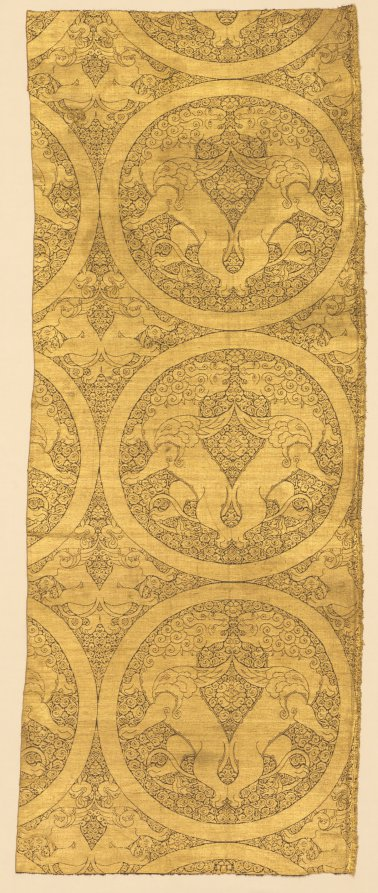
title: Cloth of gold with winged lions and griffins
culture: Central Asia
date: 1225–75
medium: Silk and gold thread: lampas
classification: Textile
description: The Mongols created exceptionally sumptuous cloths of gold to symbolize their imperial authority and legitimacy, this being the most resplendent example known. Opulent expanses of gold thread enrich the roundels, lions, and griffins in striking contrast with the intricate brown silk foliate ground. The pattern integrates motifs from Iran—paired lions in roundels and paired griffins—and from China, cloud ornaments on the lions’ wings. They suggest it was woven in an imperial workshop in Central Asia where Iranian and Chinese craftsmen worked together with local artisans. The gold is on a paper substrate associated with Asia, whereas animal skin substrates were used in Islamic lands. It is woven in a new technique developed by Iranian weavers, a combination of two weaves known as lampas, which was adopted internationally.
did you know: The tail of each paired griffin passes between its hind legs, loops around a rosette, and terminates in a feline head.